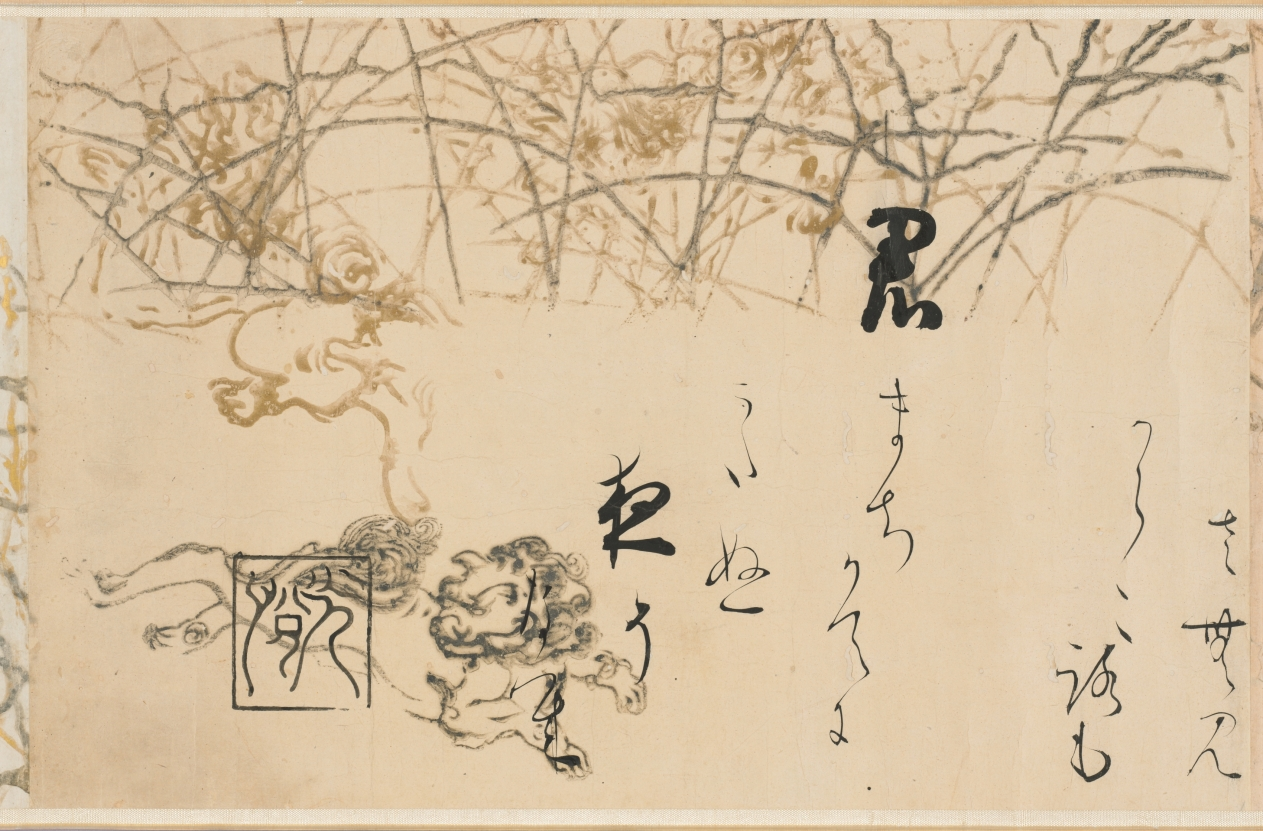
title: Selections from the New Collection of Japanese Poems from Ancient and Modern Times (Shinkokin wakashū) with Printed Designs of Chinese Lions and Crab Finger Grass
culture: Japan, Edo period (1615–1868)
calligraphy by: Hon'ami Kōetsu (Japanese, 1558–1637)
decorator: Tawaraya Sōtatsu (Japanese, c. 1570–c. 1640)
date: early 1600s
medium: handscroll; ink, gold, and silver on paper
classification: Calligraphy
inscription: Seal: 光悦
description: Hon’ami Kōetsu was a calligrapher and craftsman who frequently collaborated with the painter Tawaraya Sōtatsu, considered the first master of the Rinpa school. Kōetsu brushed seven poems from the autumn section of a poetry anthology onto dyed paper with motifs designed and printed in gold and silver by Sōtatsu.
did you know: Before becoming a master painter of screens, Tawaraya Sōtatsu painted fans.